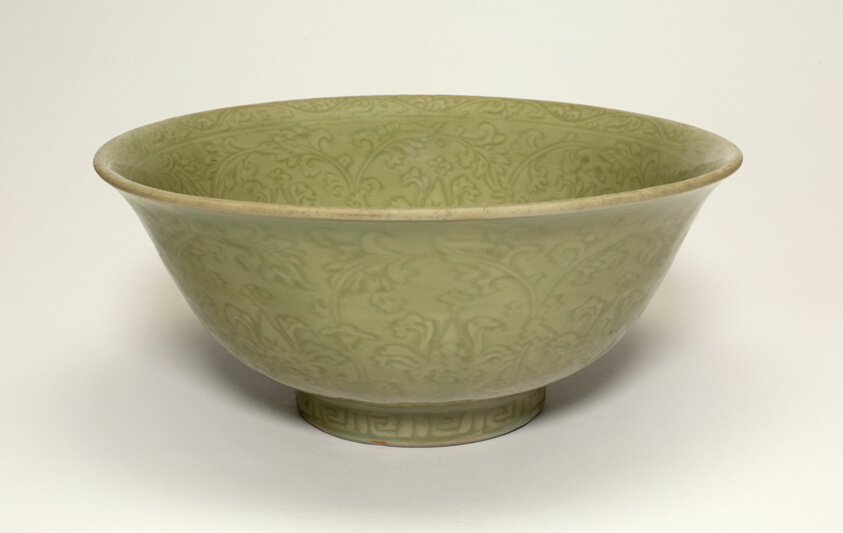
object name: Decorative Arts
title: Bowl with Floral and Leaf Sprays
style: Chinese (culture or style)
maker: China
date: Ming dynasty (1368–1644)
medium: Celadon-glazed stoneware with underglaze carved decoration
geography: China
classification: bowl; stoneware; dish (vessel); asian art; ceramics; decorative arts